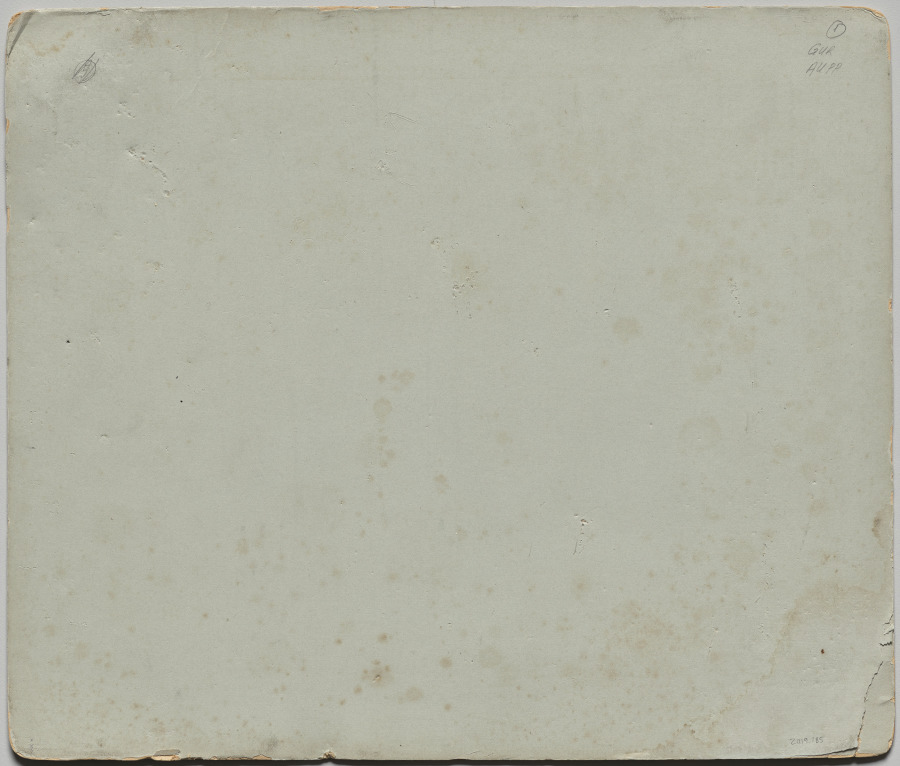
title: India. Benares. Aurangzeb's Mosque, after a photo by Dr. Kurt Boeck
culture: India, 19th century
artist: Photoglob Co. (Zurich, active c. 1890–1910)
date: c. 1890–1910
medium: Photochrom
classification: Photograph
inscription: Imprinted in type on recto: “20.026.P.Z.-BENARES.AURUNGZEB’S MOSQUE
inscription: Written in pencil on verso of mount: “5 (circled and scribbled out)/1 (circled) GUR AUPP”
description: The sixth Mughal emperor Aurangzeb, a very pious Muslim, had this enormous mosque built in a blend of Islamic and Hindu architectural styles. It was constructed in the late 17th century on the site of one of the most sacred ancient Hindu temples in the city of Varanasi (formerly Benares).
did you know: The Taj Mahal was created as a tomb for Aurangzeb’s mother.